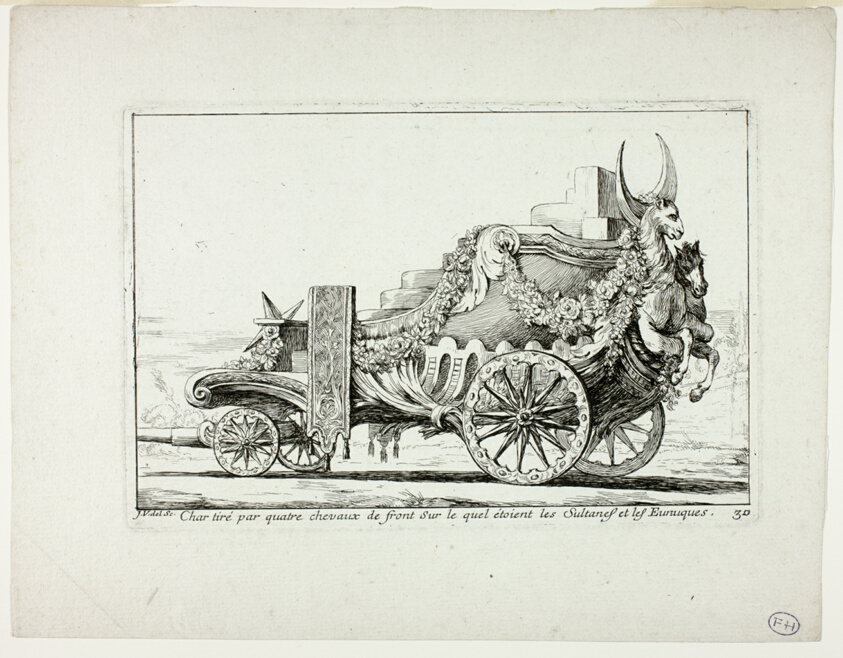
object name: Print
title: Char tiré par quatre chevaux de front, Sur lequel étaient les Sultanes et les Eunuques, plate 30 from Caravanne du Sultan à la Mecque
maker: Joseph-Marie Vien, the elder; French, 1716–1809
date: 1748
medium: Etching on ivory laid paper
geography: France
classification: etching; paper; print; prints and drawing